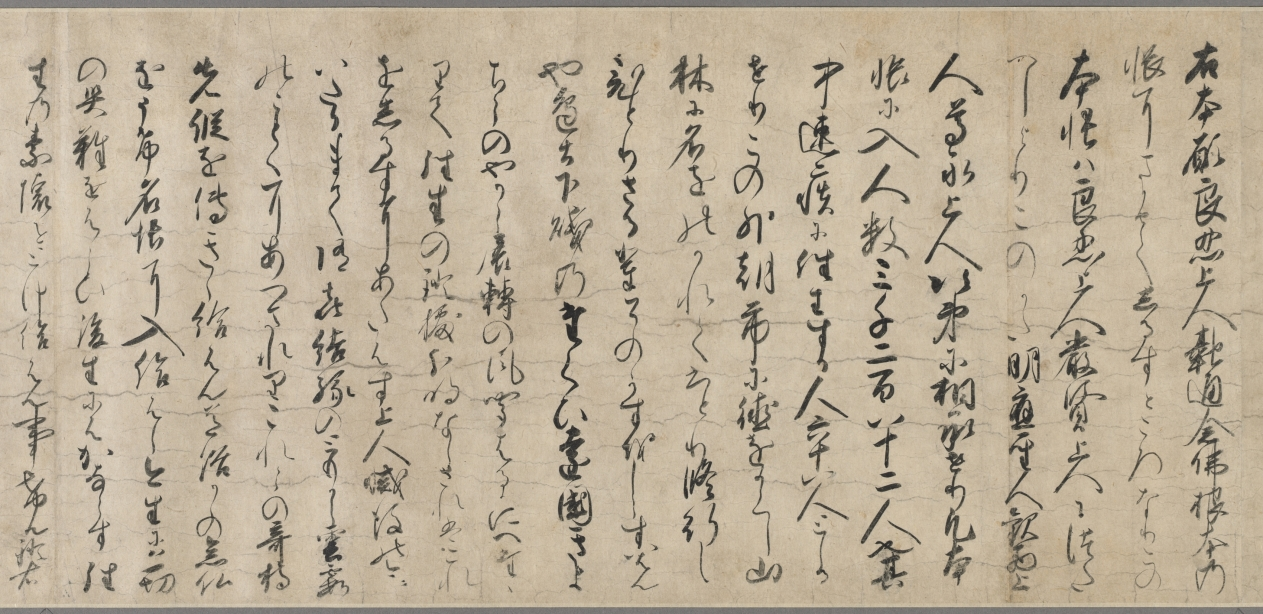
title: The Illustrated Miraculous Origins of the Yūzū Nenbutsu School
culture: Japan, Kamakura period (1185–1333)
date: early 1300s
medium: Handscroll; ink, color, and gold on paper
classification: Painting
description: This painting is the second of a set of two illustrated handscrolls. The first scroll depicts the biography of the Japanese Buddhist monk Ryōnin. This scroll begins with scenes of Ryōnin’s death and relates episodes illustrating the efficacy of following his teachings. Ryōnin asserted the total interconnectedness of all things and the spiritual benefit of chanting the name of the Buddha Amida for one another.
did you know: The other scroll from this two-scroll set belongs to the Art Institute of Chicago.